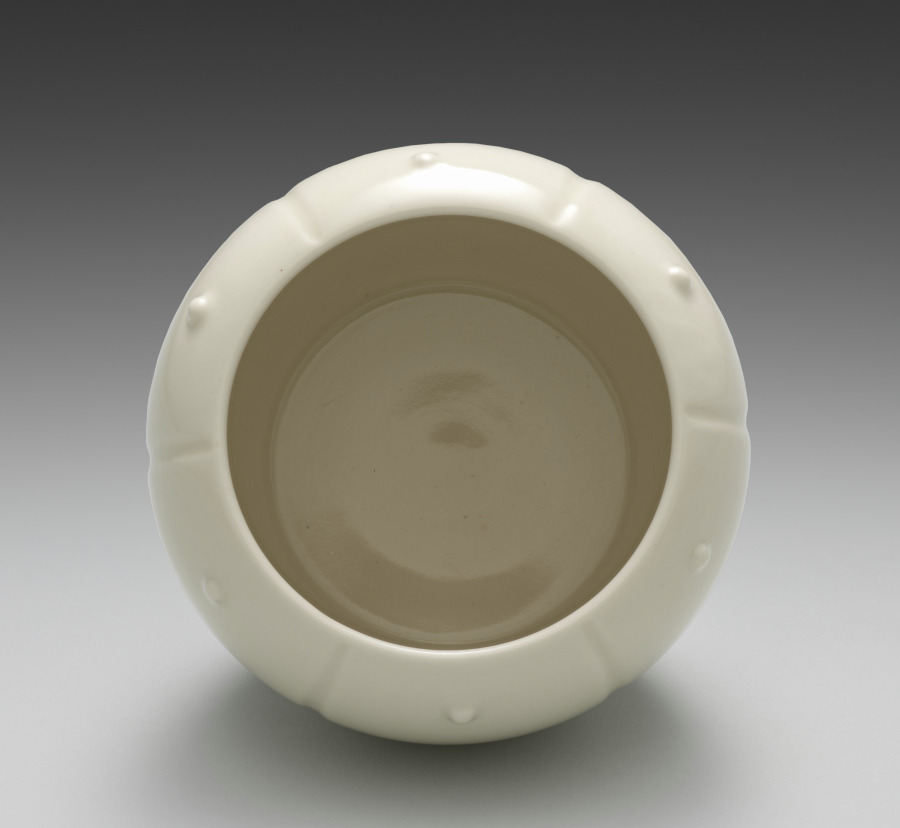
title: Container from Lit Charcoal and Ash Containers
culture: Japan, Meiji period (1868–1912)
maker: Seifū Yohei III (Japanese, 1851–1914)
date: 1893–1914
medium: One from a set of four containers; porcelain with molded design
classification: Ceramic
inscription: 清風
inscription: The storage box for this set is inscribed and impressed with seals.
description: The box lid for these six-lobed lit charcoal and ash containers, or hiire, identifies them as kōhakuji, another of Yohei III’s translucent cream colors over ivory clay bodies. One might translate the name as “lustrous pearl[–glazed ivory] porcelain.” A hiire was filled with ash with burnt coals at the center so that embers and tobacco ash could be discarded safely during a gathering. Each of the lobes on the containers has a round protrusion set below the rim. The studlike pattern is called ruiza. The term is also used to describe the pattern that rings the shoulder of some flower vases or metal kettles used in chanoyu.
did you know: The Seifu studio generally followed the standard practice in Japan for identifying the artist and object in box inscriptions.